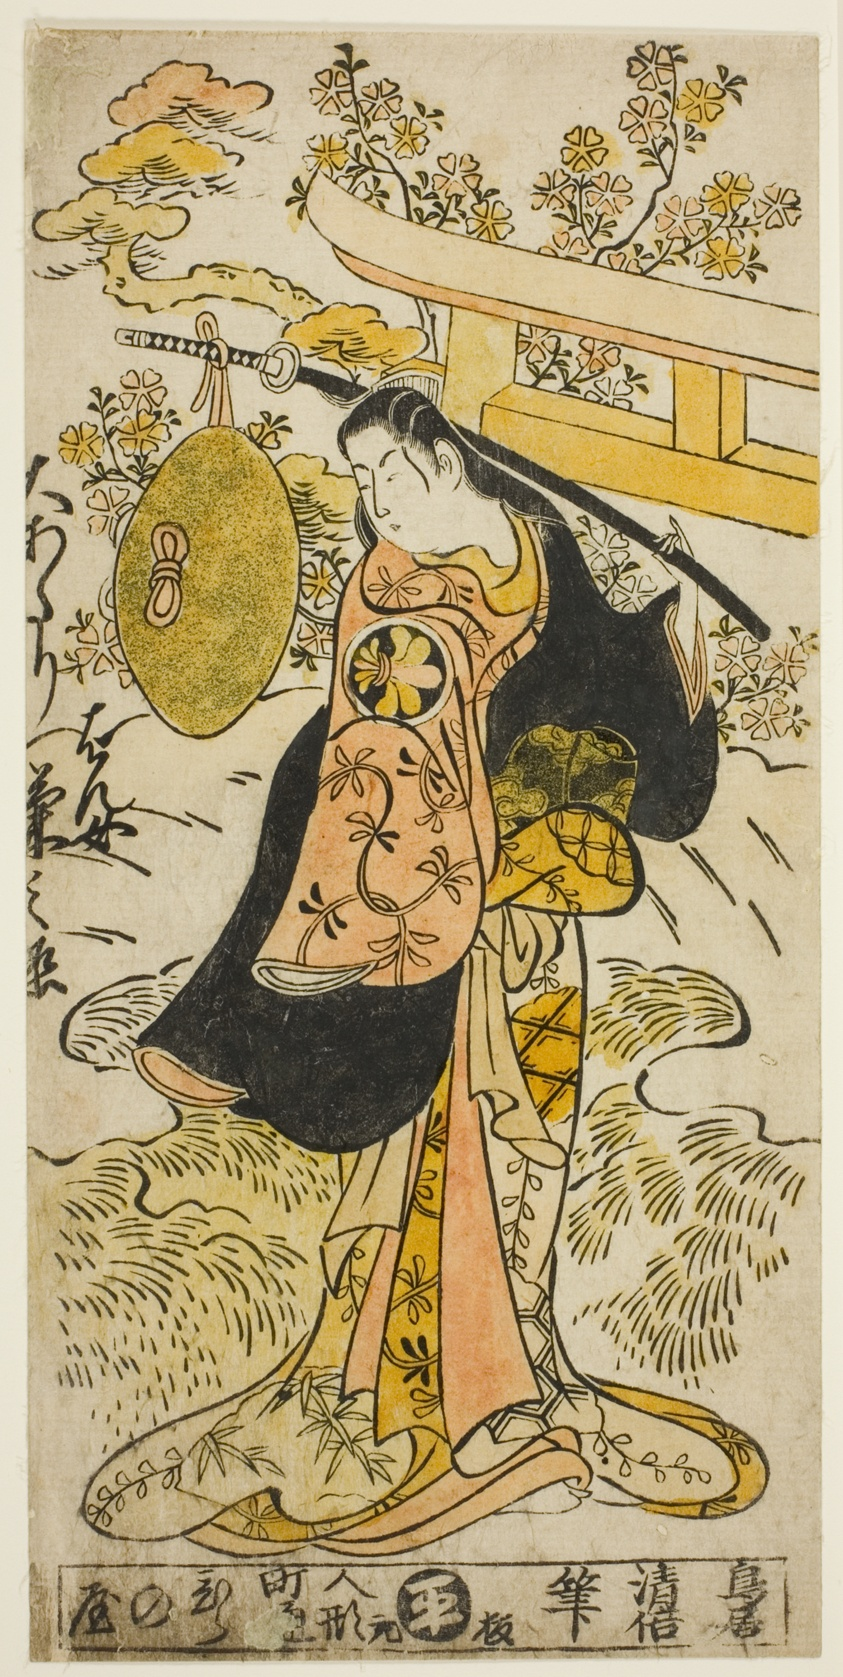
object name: Print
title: The Actor Segawa Kikunojo I as Hanjo in the play "Tsumagoi Sumidagawa," performed at the Nakamura Theater in the third month, 1733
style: Japanese (culture or style)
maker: Torii Kiyomasu II (Japanese, 1706 (?)–1763 (?))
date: 1733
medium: Hand-colored woodblock print; hosoban, urushi-e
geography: Japan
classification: woodblock print; print; asian art